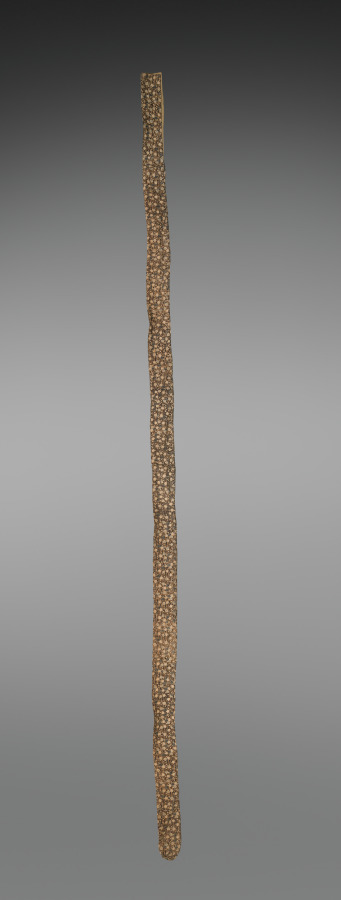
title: Bow: cloth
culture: Japan, Edo period (1615–1868)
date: early to mid-1800s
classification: Arms and Armor